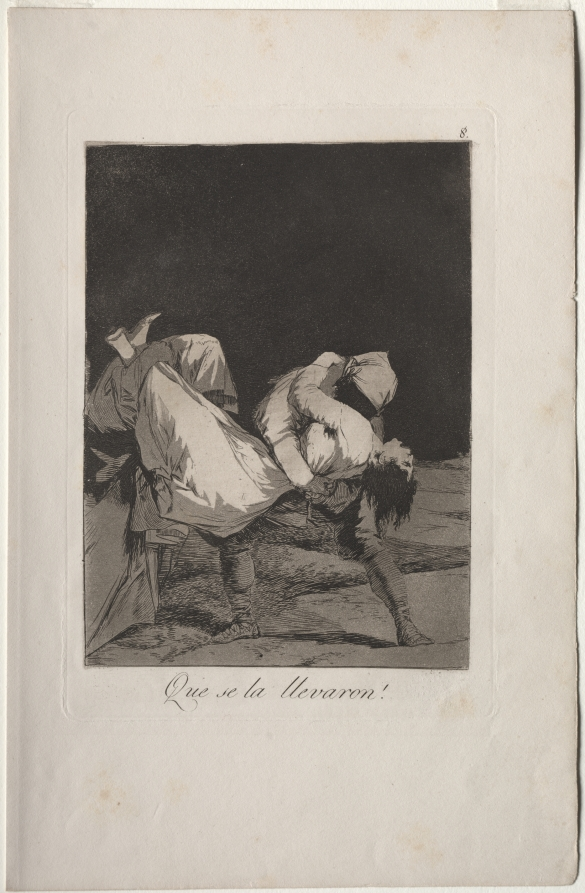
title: They Carried Her Off!, Plate 8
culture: Spain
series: Los Caprichos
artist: Francisco de Goya (Spanish, 1746–1828)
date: 1799, printed c. 1855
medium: etching and aquatint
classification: Print